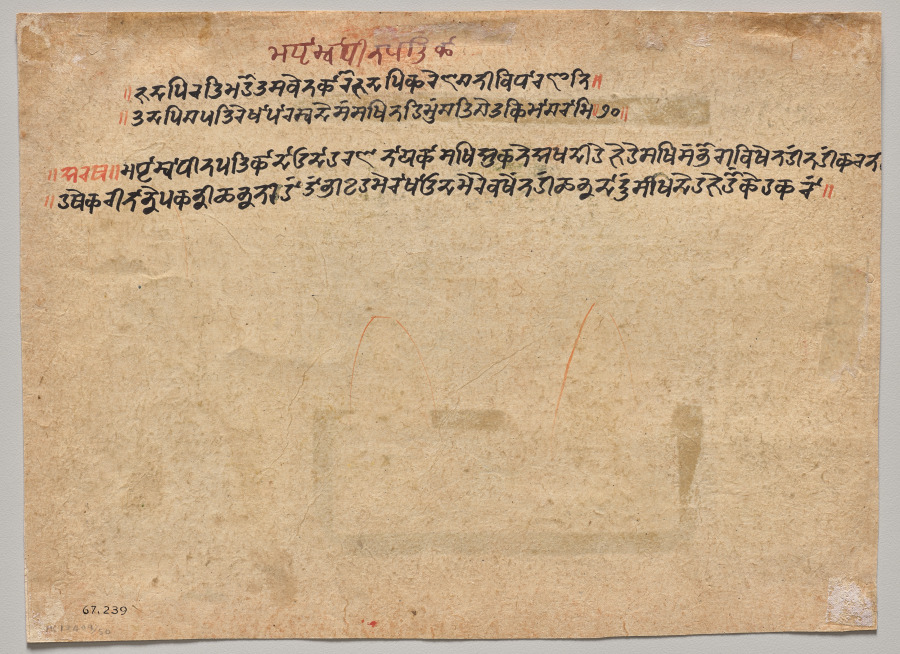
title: The Heroine Who is Faithfully Loved: Madhya Svadhinapatika Nayika, from a Rasamanjari of Bhanudatta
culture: Northern India, Pahari kingdoms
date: c. 1710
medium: Gum tempera, ink, and gold on paper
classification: Painting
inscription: Madhyā Svādhīnapatikā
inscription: Madhyā Svādhīnapatikā jadapi rati mahotsave nakāro jadapi kareṇa ca nīvi dhāraṇāni. 70 tadapi ca patirekhā pārasvādeśaṁ sakhi nahi muṅcati takisācarāmi.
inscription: Aratha. Svadhīnapatikā dā udāharaṇa. Nāīkā sakhiyā kane ākhadī hai je hai sakhi saṁbhoga vikhe nahiṅ nahiṅ kardī hathe karī nāde pakadī chaḍanī haṅ tāṅ bhī e merā khāund mere vakhen nahīṅ chaḍadā huṅ sīkh de jeu keh karāṅ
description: The heroine sits in front of the elongated red cushion, gesturing to her companion in conversation. She is trying to decide if she should agree to submit to her husband or continue to be coy. A verse from a Sanskrit poem by Bhanudatta Misra, who lived during the late 1400s to early 1500s in northeastern India, has been quoted on the back of the painting. The verse has been written both in Sanskrit using the Takri script of the Pahari region and in a local vernacular translation.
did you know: The man at right nervously grasps his scarf as he respectfully approaches his lover and her companion.